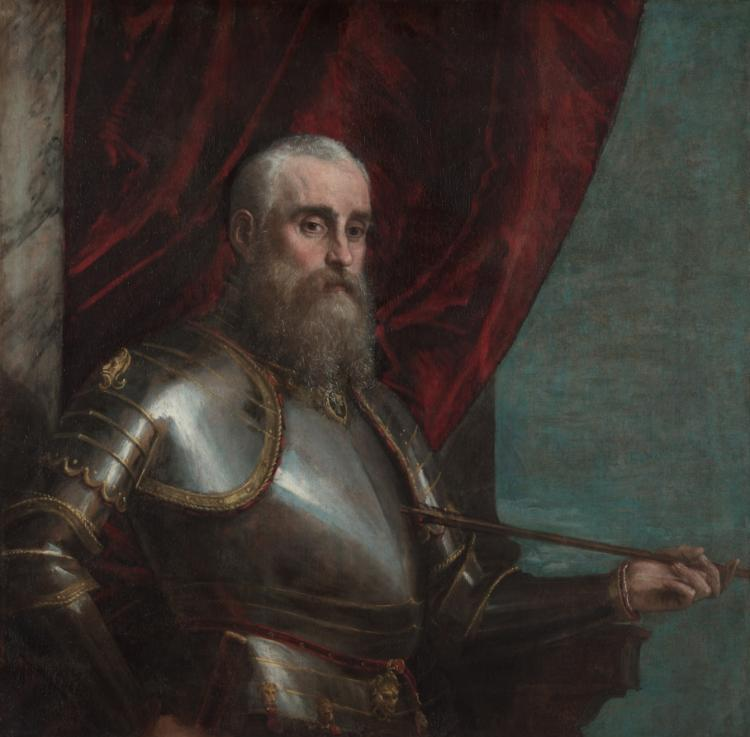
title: Portrait of Agostino Barbarigo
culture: Italy, Venice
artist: Paolo Veronese (Italian, 1528–1588)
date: after c. 1571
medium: oil on canvas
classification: Painting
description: Barbarigo served as second in command of the Venetian naval forces during the Battle of Lepanto, fighting against the Ottoman Empire on October 7, 1571. During the skirmish, Barbarigo was slain by a Turkish arrow, which he holds in the portrait. Barbarigo’s identity is defined by his military prowess. In the 1500s, Venetian military portraits often portrayed the sitter in armor in a pose typical of a Roman emperor, creating a link to the valor and might of ancient armies.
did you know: The arrow symbolically indicates that this portrait was painted after the sitter died in battle.